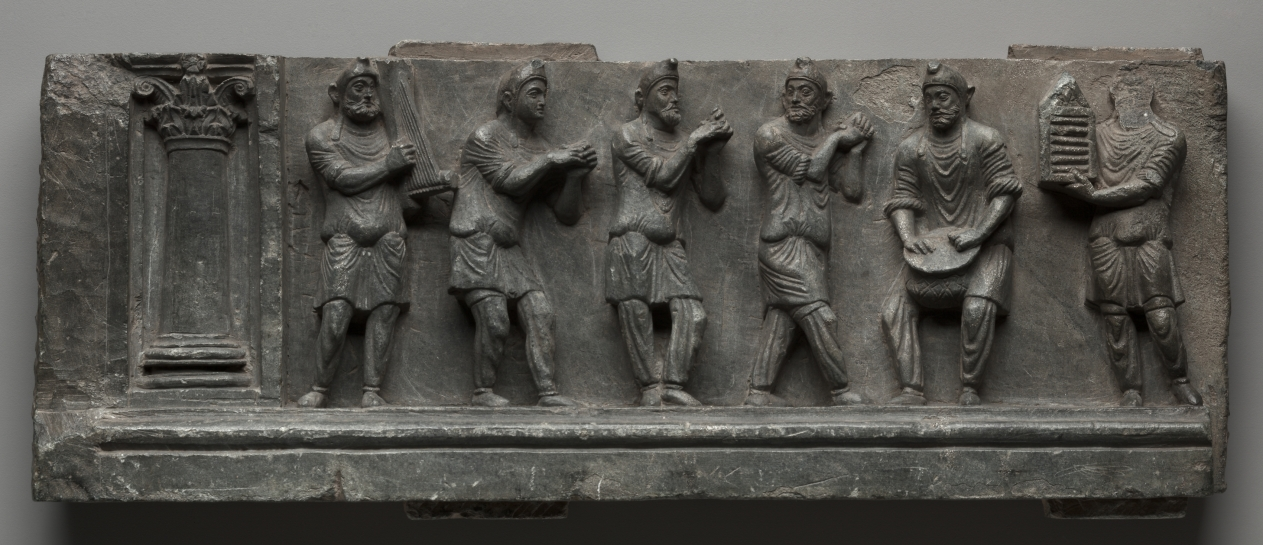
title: Dancers and Musicians from Phrygia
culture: Pakistan, Gandhara, Buner area, early Kushan period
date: 1–100 CE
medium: schist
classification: Sculpture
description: The distinctive garments worn by the figures on this relief may identify them as people from the ancient region of Phrygia, in present-day central Turkey. They wear baggy tunics with trousers tied at the ankles and peaked caps. Three figures hold their feet and hands in postures of dancing, while a musician plays a stringed instrument similar to a lyre, and a percussionist keeps time on the drum clutched between his legs. The figure at the far right holds up an unidentified object. This panel has tenons above and below to fit into a structure using no mortar. The scale of this panel suggests that it was installed as a stair riser.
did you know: The peaked hats they wear are called "Phrygian caps."